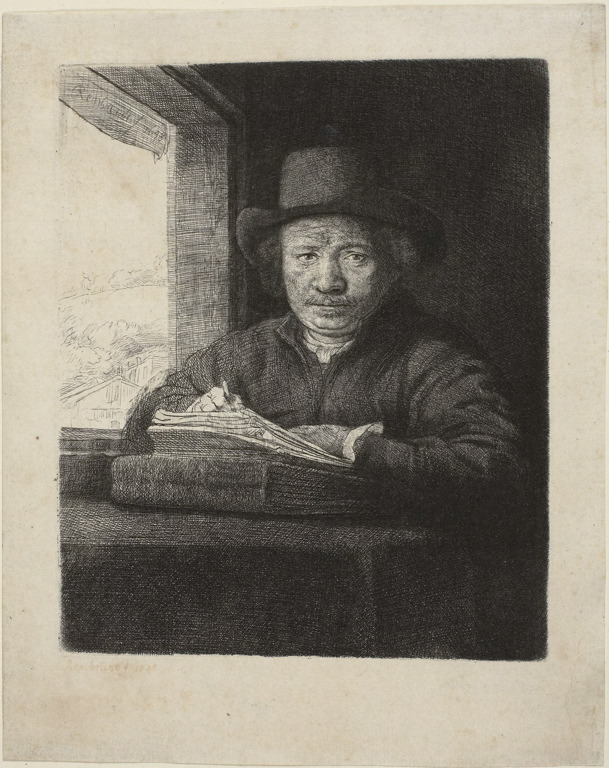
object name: Print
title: Self-Portrait Etching at a Window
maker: Rembrandt van Rijn (Dutch, 1606-1669)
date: 1648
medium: Etching, drypoint and engraving on buff laid paper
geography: Holland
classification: etching; print; prints and drawing; paper; drypoint; engraving